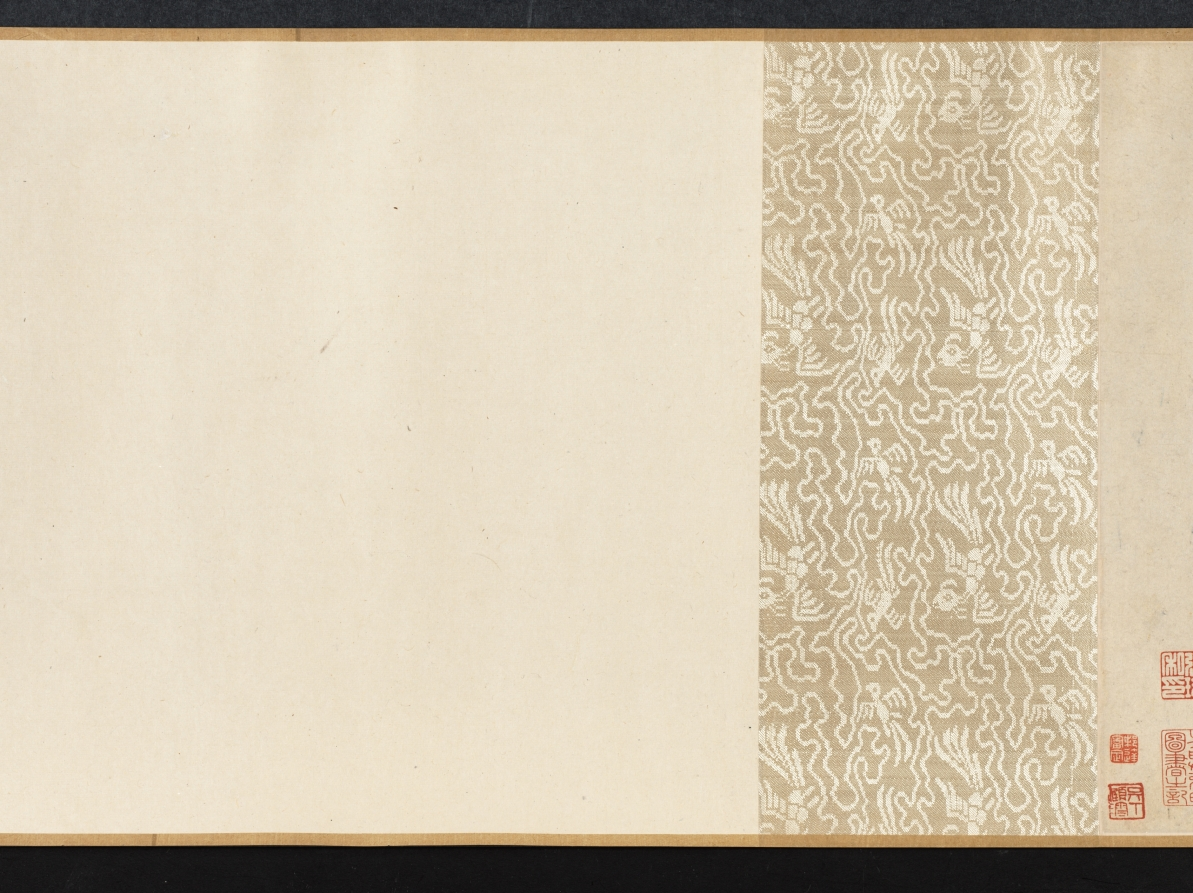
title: Chrysanthemums and Cabbage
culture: China, Ming dynasty (1368–1644)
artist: Tao Cheng (Chinese, active c. 1471–after 1502)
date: c. 1486 or before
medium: handscroll, ink and slight color on paper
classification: Painting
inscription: Artist's seal at beginning of painting: Yun hu 雲湖. Title by Wang Wenzhi 王文治 (1730–1802), date 1756. 2 seals of Wang Wenzhi 王文治 (1730-1802); 3 seals of Ku Yün (n. d.)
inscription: Section A (Chrysanthemums): 1 poem and 1 seal of Zhang Yuanzhen 張元禎 (1437–1507) - Jinshi, 1461; 1 poems and 3 seals of Ni Yue 倪岳 (1444–1501) - Jinshi, 1464; 1 poems and 2 seals of Zhao Xiang 趙祥 (life dates unknown) - Jinshi, 1469; 1 poems and 1 seals of Wu Xixian 吳希賢 (1437–1489) - Jinshi, 1464; 1 poems and 1 seals of Lü Chang 呂㦂 (1449–1511) - Juren, 1471; 1 poems and 3 seals of Fu Han 傅瀚 (1435–1502) - Jinshi, 1464; 1 poems and 1 seals of Feng Jue 馮珏 (life dates unknown) - Jinshi, 1478.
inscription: Chrysanthemums section, poem 1, by Zhang Yuanzhen 張元禎 (1437–1507): Several bushes of chrysanthemums grow in front of the Five-Willow Cottage,/ The yellow ones are really yellow and the white ones white./ This affable and decent fellow, young in years and unsophisticated,/ Has snapped one of the branches to dip in ink. (The Five-Willows Cottage was the home of the poet Tao Qian 陶潛 (Tao Yuanming 陶淵明, AD 365-427).) Chrysanthemums section, poem 2, by Ni Yue 倪岳 (1444–1501): Where at the Eastern Fence can you grieve for the Soul of the Xiang River?/ A man of upright character is mourned within the traces of ink./ White jade with a slight flaw would be a grievance forever,/ Later men should understand why even the roots of the flowers are washed. (Eastern Fence refers again to the poet Tao Qian 陶潛, while the Soul of the Hsiang River refers to the poet Qu Yuan 屈原 (c. 340–278 BC).) Chrysanthemums section, poem 3, by Zhao Xiang 趙祥 (life dates unknown): A clump of chrysanthemum grows in front of the bamboo pavilion,/ The winds of many autumns have blown since we parted beyond the river./ Straining wine through the official's cap of Tao [Qian] to prolong autumn's pleasures,/ The mists and clouds of ten thousand miles belong to the intoxicated. Chrysanthemums section, poem 4, by Wu Xixian 吳希賢 (1437–1489): It is a different spring if mulberry is planted during the latter part of the year,/ The dust of the world originally did not drop on clothing./ Who spills out ink under the Eastern Fence/ And paints so freely this portrait of chrysanthemums for the venerable Sir Tao? Chrysanthemums section, poem 5, by Lü Chang 呂㦂 (1449–1511): This full tray of ink for painting [flowers] at the Eastern Fence;/ Their whiteness or yellowness is not essential in capturing their beauty./ I don't have to go to Jiangnan to see them myself./ At my old house grow two or three branches. Chrysanthemums section, poem 6, by Fu Han 傅瀚 (1435–1502): Who daubed autumn flowers with ink/ As if they were dark dew on a branch tip only vaguely seen at evening?/ After the lazy clouds disperse, no one paints;/ A certain unconventionality pervades this painting. Chrysanthemums section, poem 7, by Feng Jue 馮珏 (life dates unknown): To satisfy his hunger, [the chrysanthemums] have at times entered the poetry of Qu Yuan;/ Taking up the wine cup, it felt close to Tao Qian./ [With them I am like] a lonely root sustained by deep water/ Or an old man to whose hair the color of youth returns.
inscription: Section B (Cabbage): 1 poem and 1 seal of Cai Qi 蔡圻 (life dates unknown) - degree information not known; 1 poems and 3 seals of Ni Yue 倪岳 (1444–1501) - Jinshi, 1464; 1 poem and 3 seals of Jiao Fang 焦芳 (1436–1517) - Jinshi, 1464; 1 poem and 3 seals of Li Dongyang 李東陽 (1447–1516) - Jinshi, 1464; 1 poems and 1 seals of Wu Xixian, signed “Xixian” 吳希賢 - Jinshi, 1464; 1 poems and 3 seals of Fu Han 傅瀚 (1435–1502) - Jinshi, 1464; 1 poems and 1 seals of Lü Chang 呂㦂 (1449–1511) - Juren, 1471; 1 poems and 2 seals of Zhao Xiang 趙祥 (life dates unknown) - Jinshi, 1469; 1 poems and 1 seals of Feng Jue 馮珏 (life dates unknown) - Jinshi, 1478.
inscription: Cabbage section, poem 1, by Cai Qi 蔡圻 (life dates unknown): The ink splashes are fresh from a frosty brush dipped in pond water;/ I can visualize that time when Yunhu 雲湖 [Tao Cheng] first showed his talents./ I lament the places where I scribbled before,/ Who would open them to inscribe a poem? (The first line is an allusion to the famous Jin dynasty calligrapher Wang Xizhi 王羲之 (AD 303-361), who practiced calligraphy so diligently at the edge of a pond that the water turned black with ink.) Cabbage section, poem 2, by Ni Yue 倪岳 (1444–1501): After rain the vegetables begin to grow;/ How are the colors of the masses lately!/ Once you get used to them, the tastiest parts are the ends of the roots;/ I don't know if they can be used for "seasoning soup." ("Seasoning soup" is an allusion to the statesmanship of a chief minister.) Cabbage section, poem 3, by Jiao Fang 焦芳 (1436–1517): This crop of purple stalks and green leaves is late and irregular;/ Now the rainy season is over for the Eastern Garden./ All the nobles nowadays dine on meat;/ Who of them knows the flavor of this [cabbage]. Cabbage section, poem 4, by Li Dongyang 李東陽 (1447–1516): It's always helped the honest man to sober up after drinks./ I intend to go to the deepest part of the stream-crossed garden/ To refresh myself in the fragrance and dew of evening. Cabbage section, poem 5, by Wu Xixian 吳希賢 (1437–1489): After rain, the white silk is filled with fragrant vegetables;/ How many times this happens in Mr. Tao's paintings./ On whom will you depend to present a memorial to the ruler?/ Don't let this color emerge on the faces of the people. (The last line is meant as a warning to officials: the color of the vegetables (green) may be pleasing in itself, but when it emerges on the faces of the starving poor, it signifies a badly governed world.) Cabbage section, poem 6, by Fu Han 傅瀚 (1435–1502): For twenty years I have feasted on the excellent mutton of an official;/ Yet I talk and dream about the garden and its vegetables./ Do not merely say it is good to chew the root of the cabbage--/ You must taste to understand what poverty is. Cabbage section, poem 7, by Lu Chang 呂㦂 (1449–1511): The capital is never a place for an apprentice in the "garden of scholarship."/ Who would write about gardens and vegetables on an examination paper?/ I've walked throughout the country in spring;/ Make sure the people don't show this color. Cabbage section, poem 8, by Zhao Xiang 趙祥 (life dates unknown): After a wash of rain, the spring garden is still in order;/ The flavor [of the cabbage] is more suitable with a small drink and the hum of a tune./ The rich and powerful in their mansions consume dish after dish of meat;/ Vegetarian food is known only by the scholars. Cabbage section, poem 9, by Feng Jue 馮珏 (life dates unknown): A new cabbage is nourished with dew;/ It takes a long time to grow and mature./ The business of "seasoning the soup" is your responsibility;/ Better command the gardener to take care [of the cabbages]. trans. HK/LYSL/WKH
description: On an autumn day in Beijing, Tao Cheng had a gathering with a group of scholar-officials and created two paintings in a spontaneous, casual style. The first depicts chrysanthemums, slender bamboo stalks, and a rock in monochrome ink. Tao applied light colors for the second painting that depicts cabbage. Tao deliberately placed the images on the first sections of the paper so that his honorable guests could add their poetic inscriptions inspired by his imagery. In the first section to the right, all seven poetic inscriptions refer to the beloved poet and recluse Tao Qian (also called Tao Yuanming, AD 365–427) who was particularly known for his profound love for chrysanthemum flowers. Most of the inscriptions in the second section express sympathy for the poor, since cabbage is the main ingredient in their humble food. Taken together, the poems and paintings allude to the life and responsibilities of the scholar-official: the importance of both an upright character and a concern for the poor citizens in order to achieve good government.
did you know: Eminent calligrapher Wang Wenzhi 王文治 was only 27 sui when he wrote the title in 1756.